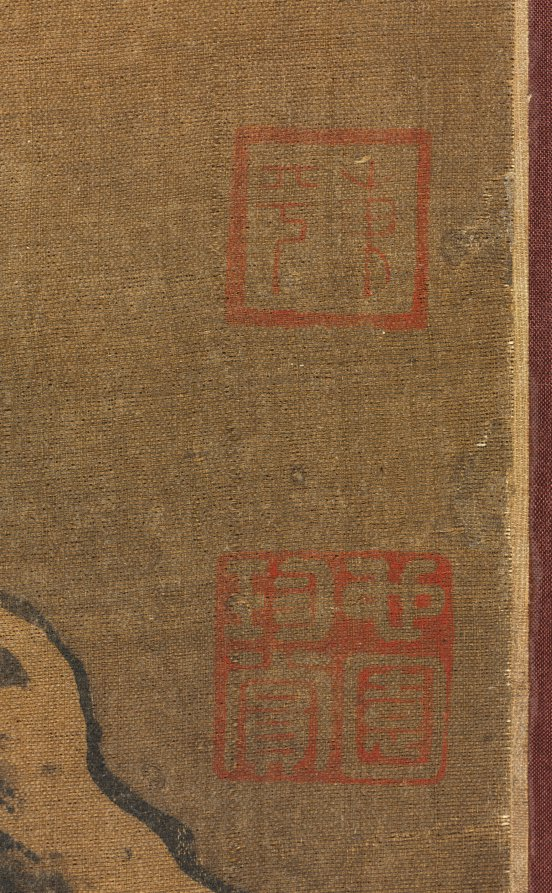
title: Birds in a Grove in a Mountainous Winter Landscape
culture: China, Jin dynasty (1115-1234)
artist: possibly by Gao Tao (Chinese, 1100s)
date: 1100s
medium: hanging scroll; ink and slight color on silk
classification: Painting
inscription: A signature and a seal at lower left edge: Gao Tao 高燾; seal undecipherable. 10 additional seals: 1 of Zhu Gang 朱棡 [1358–1398]; 3 of Suo’etu 索額圖 [1636–1703]; 2 of A’erxipu 阿爾喜普 [1700s]; 1 of Weng Fanggang 翁方綱 [1733–1818]; 3 unidentified.